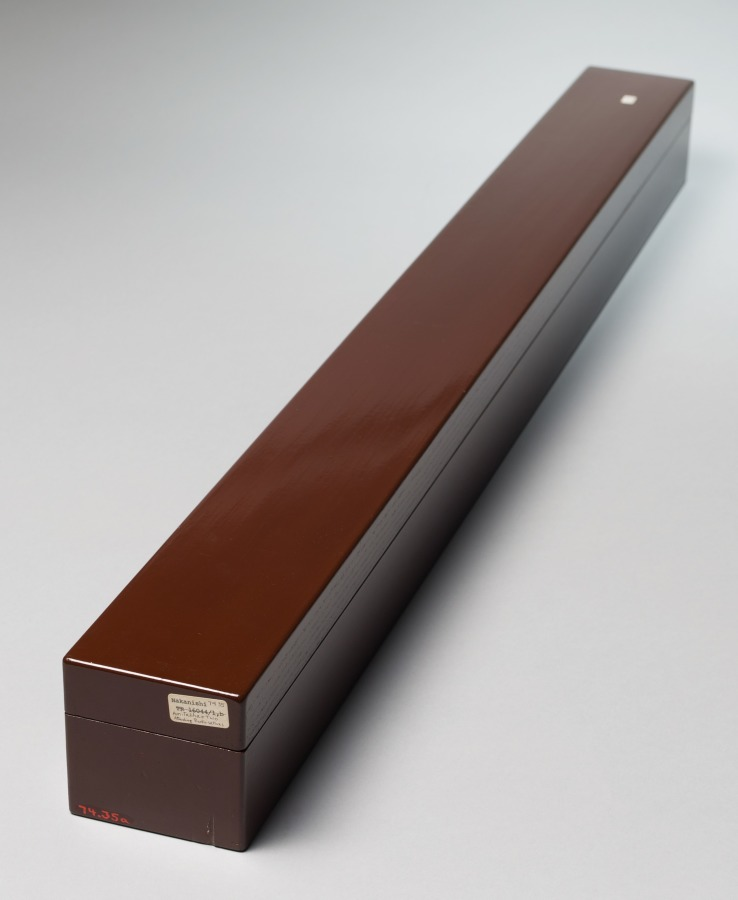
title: Buddha Amitābha with Two Attending Bodhisattvas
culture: China, Southern Song dynasty (1127-1279)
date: 1200s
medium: Hanging scroll; ink and color on silk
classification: Painting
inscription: 南無阿彌陀佛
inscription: 沙門善導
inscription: 觀世音菩薩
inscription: 大勢至菩薩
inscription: 永隆元年十月十五日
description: The supreme deities that rule over the Western Paradise—Amitābha (阿彌陀 in Chinese), Avalokiteśvara (Guanyin 觀音), and Mahāsthāmaprāpta (Dashizhi 大勢至)—are here enclosed within a circle of light. To secure entry into that paradise for Buddhist followers of the Pure Land sect, one must recite the phrase namo amituofo (南無阿彌陀佛, Homage to the Buddha Amitābha). Here the phrase is repeated 10 times in calligraphy above the figures, reinforcing the need for continual recitation.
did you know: Each line of calligraphy, which invokes the Buddha's name, emerges from a lotus blossom.